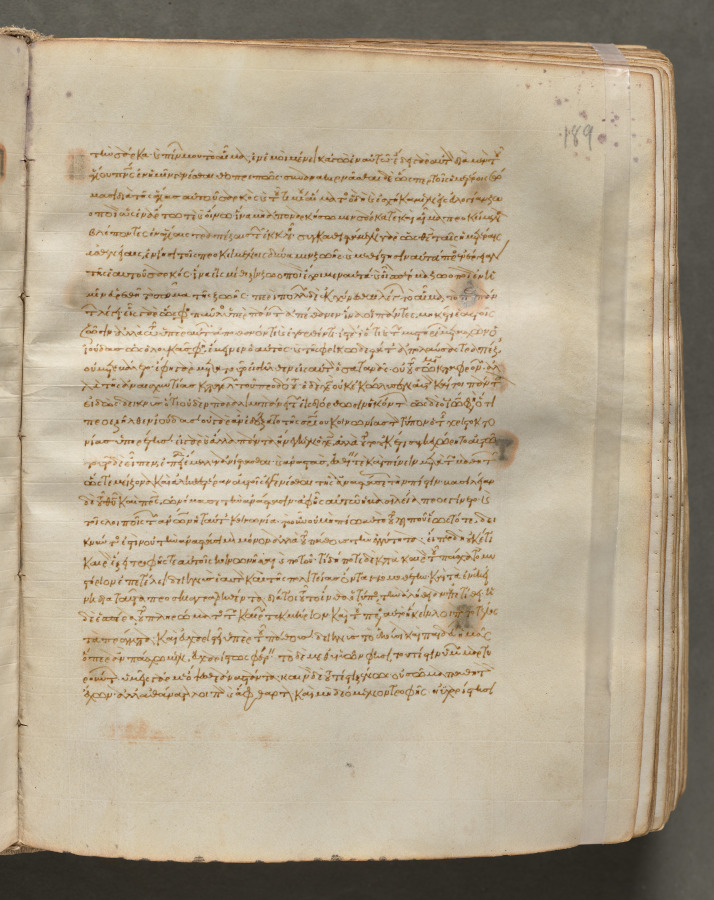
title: Text, folio 189 (recto), from a Gospel Book with Commentaries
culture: Byzantium, Constantinople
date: c. 1000–1100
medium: ink, tempera, and gold on vellum; leather binding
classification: Bound Volume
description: Each of the four gospels in this book opens on a page with brilliantly illuminated borders depicting the author of the text as well as birds-principally peacocks, symbols of the immortality of the soul-and fountains, representing the fountain of life and the salvation of the soul. This volume consists of 428 leaves with texts in Greek. Its level of sophistication suggests that it was probably written and decorated in a monastery in Constantinople.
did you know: Gospel Books were carried in procession through Byzantine churches.